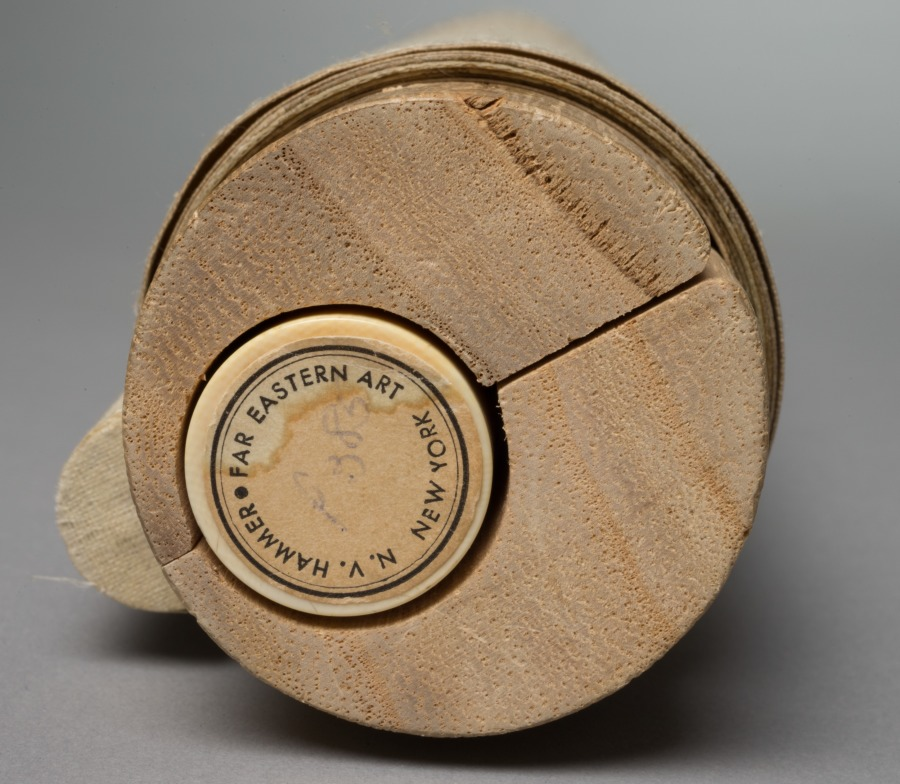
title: Beauties at the Seashore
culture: Japan, Edo period (1615–1868)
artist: Ippitsusai Bunchō (Japanese, active c. 1765–92)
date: c. 1765–92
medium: hanging scroll; ink and color on paper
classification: Painting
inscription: Undeciphered, severely faded seal in lower right corner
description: Bunchō portrays the popular subject of cooling off by the water on a late spring or early summer evening, as suggested by the willow. The seated lady enjoys her pipe-smoking—a popular pastime for Edo women. In the background, some fireworks are set off from a small boat.